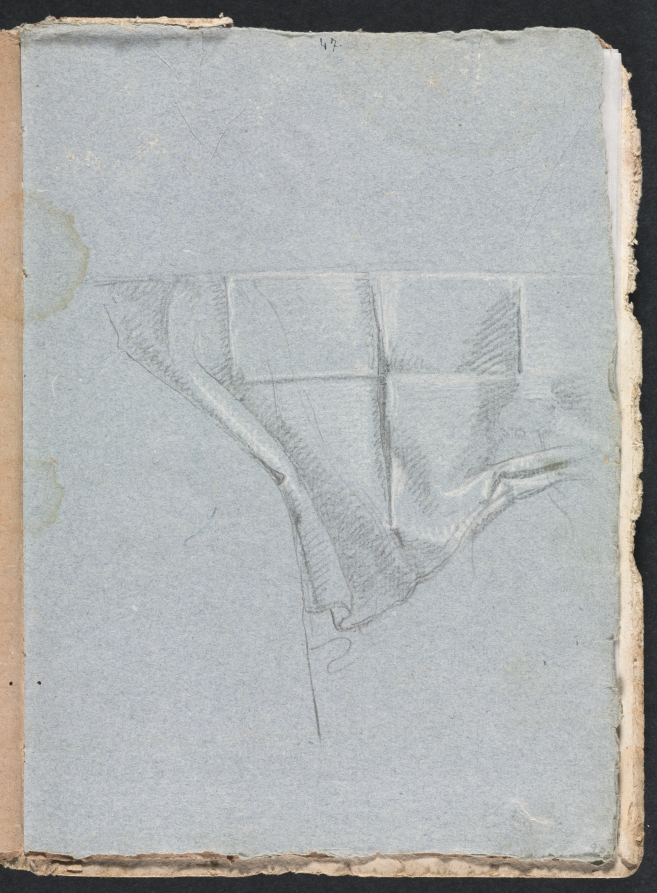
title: Verona Sketchbook: Drapery study (page 93)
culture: Italy, 18th century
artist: Francesco Lorenzi (Italian, 1723–1787)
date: 1760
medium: black chalk with white heightening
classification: Bound Volume